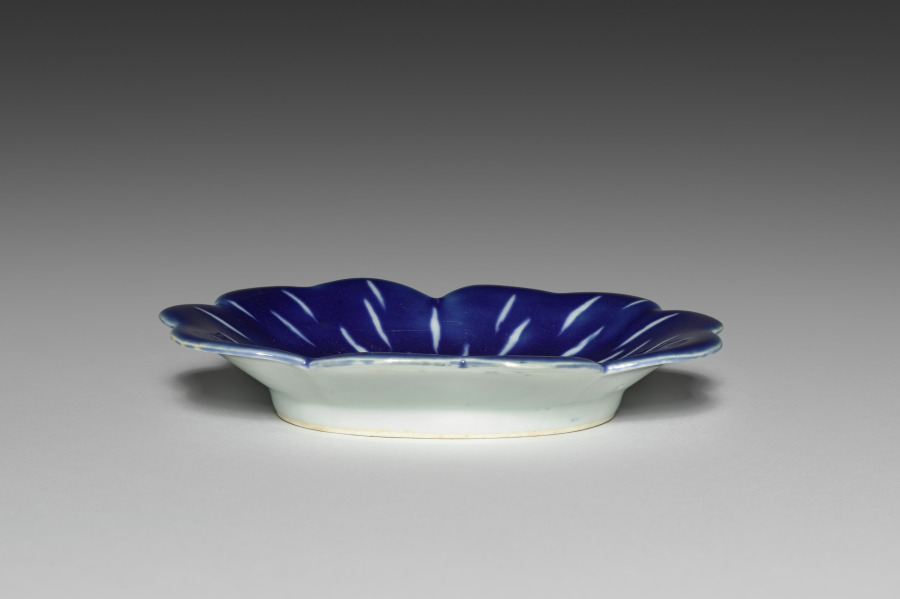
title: Small Dish (Kozara) with Fireworks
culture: Japan, Edo period (1615–1868)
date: mid-1600s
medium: Porcelain with molding and underglaze blue (Hizen ware, Nabeshima type)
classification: Ceramic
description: This dish evokes the popular summer pastime of fireworks displays.